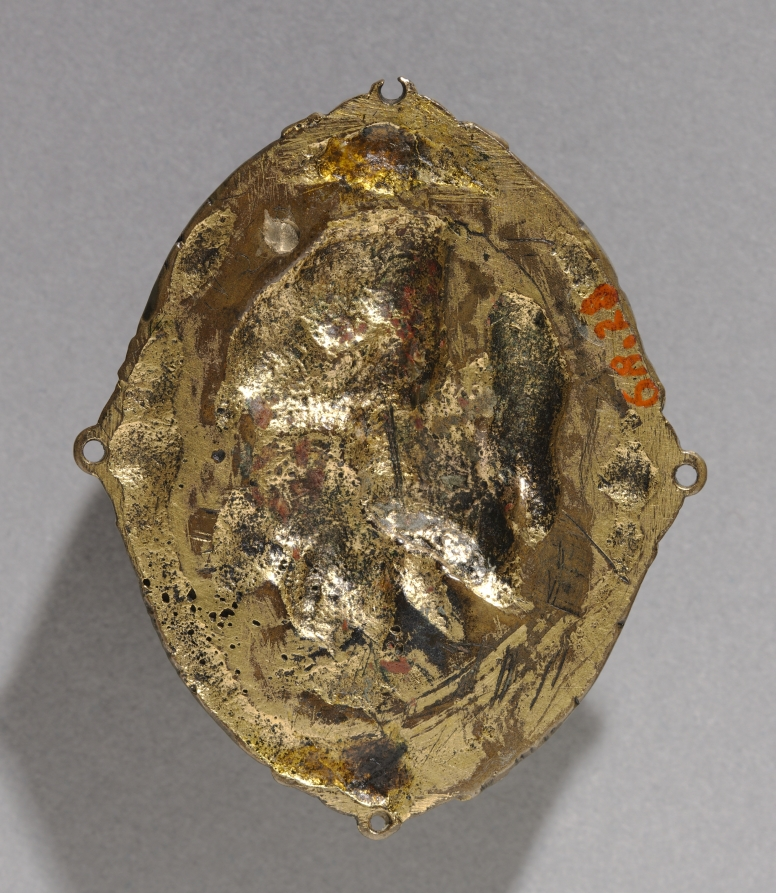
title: Jupiter and Juno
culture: Germany, late 16th century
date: late 1500s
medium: gilt bronze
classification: Sculpture